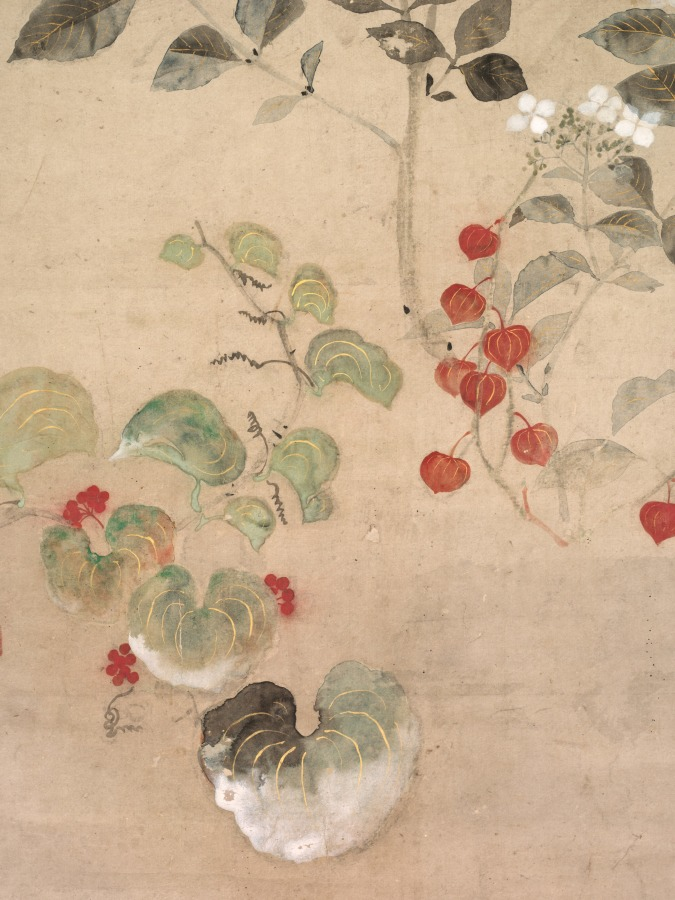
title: Summer Flowers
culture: Japan, Edo period (1615–1868)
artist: Kitagawa Sōsetsu (Japanese, active 1639–50)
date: mid-1600s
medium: hanging scroll; ink, color, and gold on paper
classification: Painting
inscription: 法橋相説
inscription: Seal: 印年 (Inen)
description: White hydrangea, orange-colored demon’s lantern, and greenbrier vine appear together in this scroll. The artist used the dripping-in (tarashikomi) technique to create a sense of depth and dimension in the leaves of the plants. A carefully controlled brush loaded with a high ratio of water to ink or color is key to the success of this brush method. Gold lines indicate the veins of leaves and the seams of pods.